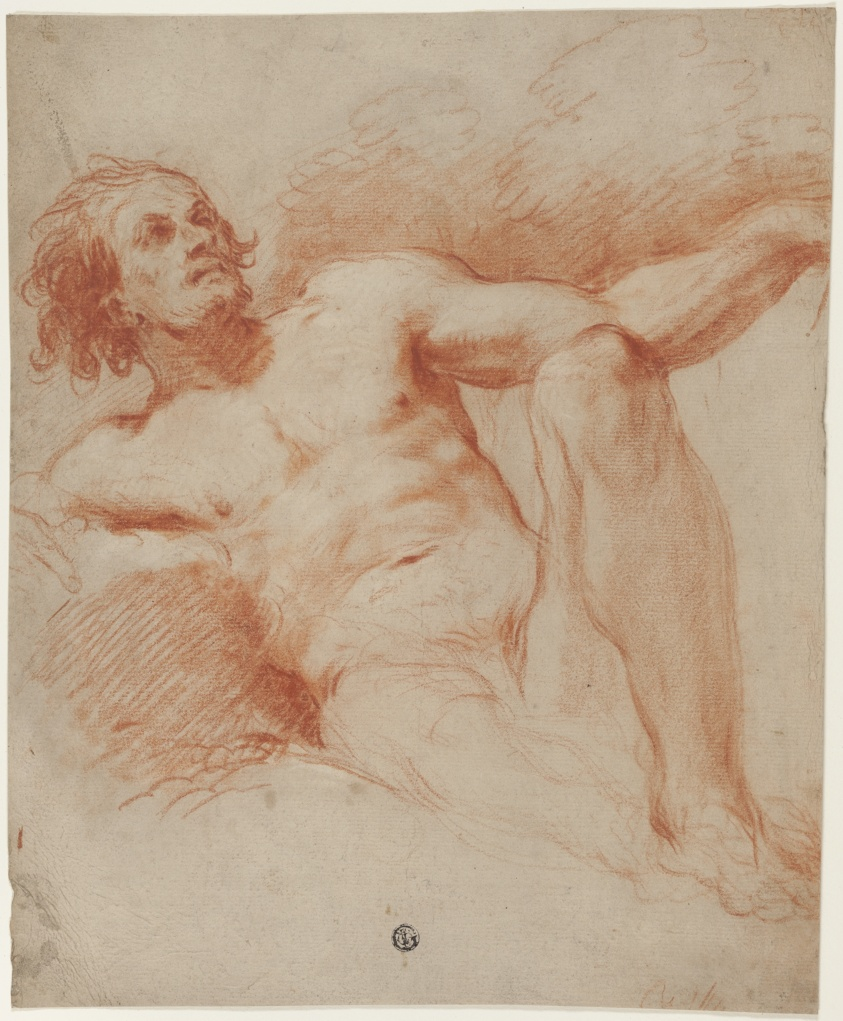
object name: Drawing and Watercolor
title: Seated Male Nude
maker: Unknown Artist; French or Italian, possibly Bolognese, 1700-1799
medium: Red chalk, with stumping, on tan laid paper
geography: France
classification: chalk; drawings (visual works); prints and drawing